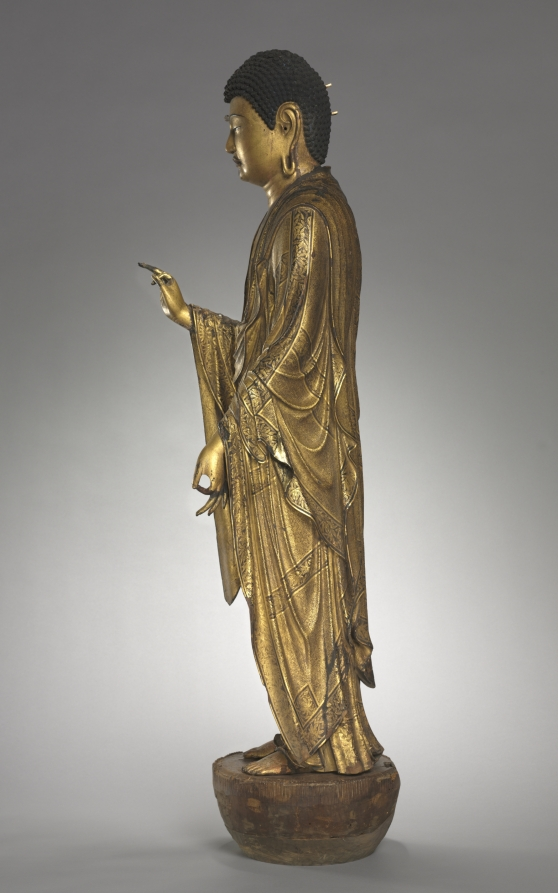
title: Buddha of Infinite Life and Light (Amida Nyorai)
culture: Japan, Kamakura period (1185–1333)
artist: Kōshun (Japanese, active mid-1200s)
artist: assisted by Koshin (Japanese, active mid-1200s)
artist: assisted by Joshun (Japanese, active mid-1200s)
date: 1269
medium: Cypress with lacquer, color, gold, cut gold, rock-crystal inlaid eyes, and quartz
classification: Sculpture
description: This ornate Buddha Amida stands in a posture of welcome, greeting the dying who will accompany him back to his Pure Land. Documents inserted into the sculpture’s hollow core around the time of its creation include a copy of the sacred text Amida Sutra, a register of donors who desired to be joined together in generating karmic merit (kechien) through the creation and dedication of the sculpture, and a record asserting that the image was completed over the course of 33 days in 1269 at Shitennōji Temple in Osaka.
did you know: The lead sculptor was Kōshun, who had been granted the lofty title “Bridge of the Law.”